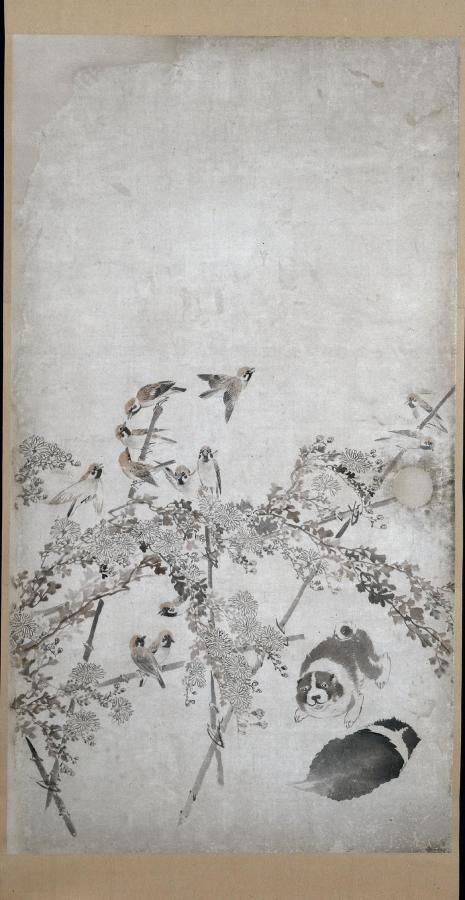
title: Puppies, Sparrows, and Chrysanthemums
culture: Japan, Edo period (1615–1868)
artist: Nagasawa Rosetsu (Japanese, 1754–1799)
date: c. 1792–94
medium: Fusuma panel remounted as a hanging scroll; ink and slight color on paper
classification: Painting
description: These paintings were originally mounted as sliding doors (fusuma) used inside a building. The circular areas on the paintings’ paper surfaces are traces of the former positions of the door pulls (hikite). A flock of sparrows gathers on a trellis supporting flowering chrysanthemum. Below is a litter of puppies, some cavorting, others napping. The tender story created by the curious puppy peering up and tilting its head to listen to the bird’s insistent call (in the leftmost part of the composition) is characteristic of Nagasawa Rosetsu’s paintings, which often use animals to illustrate the human condition.